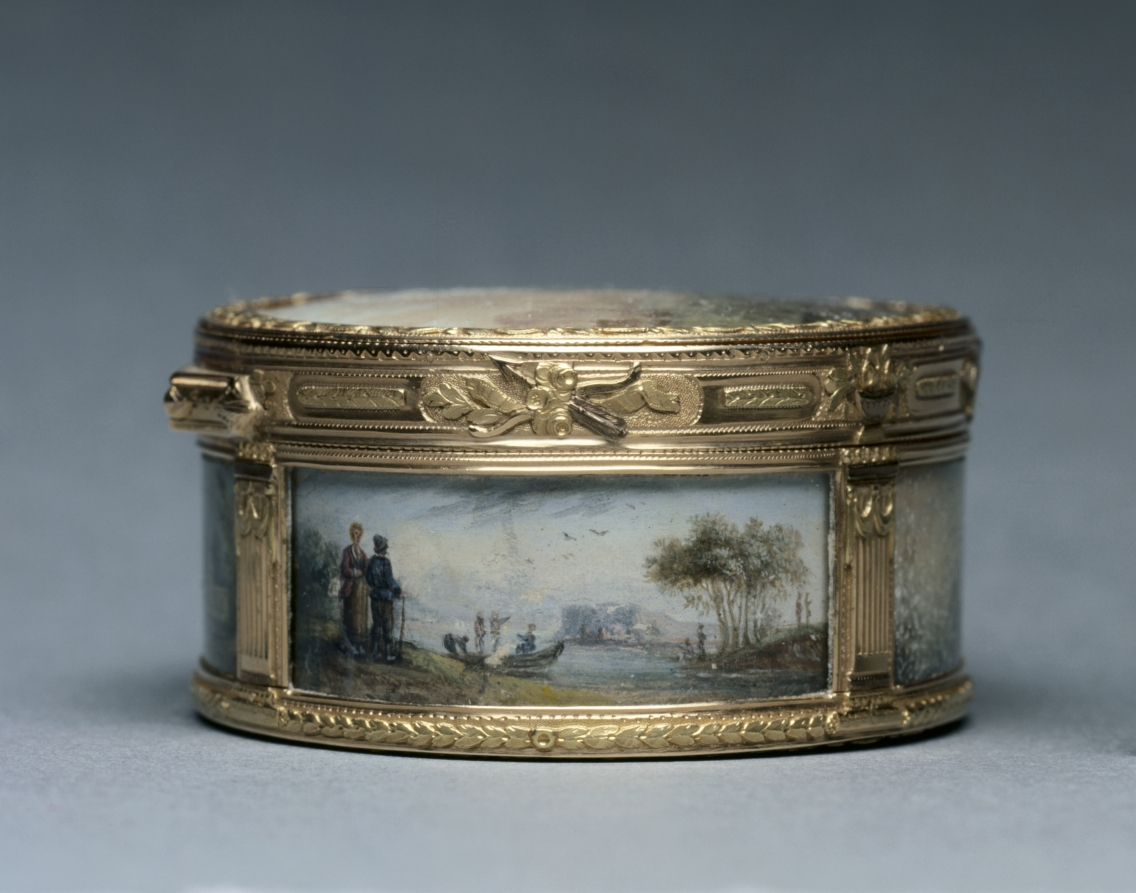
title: Snuff Box (Tabatière)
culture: France, 18th century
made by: Pierre-Nicholas Pleyard (French)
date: 1768–69; 1776–78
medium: gouache miniatures mounted on gold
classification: Metalwork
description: Snuff boxes were highly ornamented functional objects popular among French social elites. They were simultaneously containers for powdered tobacco and a means to communicate social and political status. Often decorated with miniature paintings inspired by popular paintings of the time, the works reproduced on this box are modeled after those of Claude-Joseph Vernet (cover and front panel) and David Teniers the Younger (base, side, and back panels).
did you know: These miniature paintings are mounted à cage, a practice popular in the mid-1700s that involved setting decorated panels into gold frames to create a box’s walls.